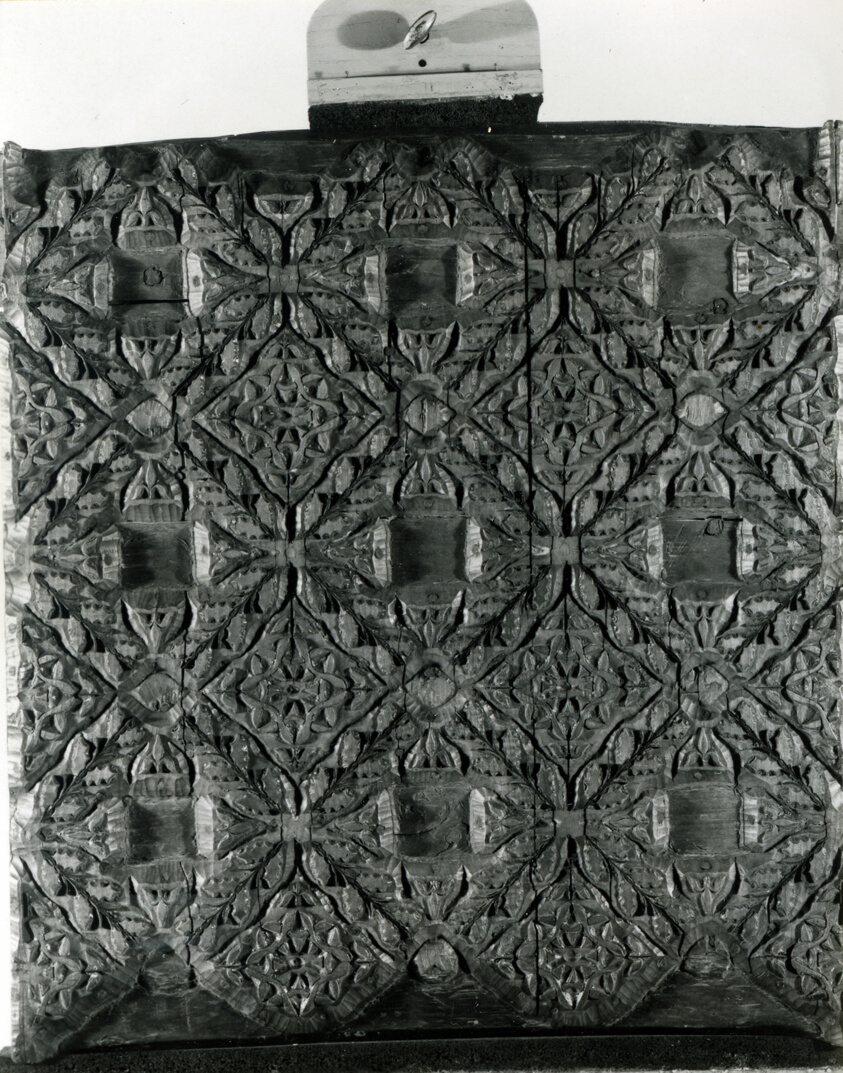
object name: Textile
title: Printing Block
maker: France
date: 18th century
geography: France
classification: textile; textile working equipment; weaving